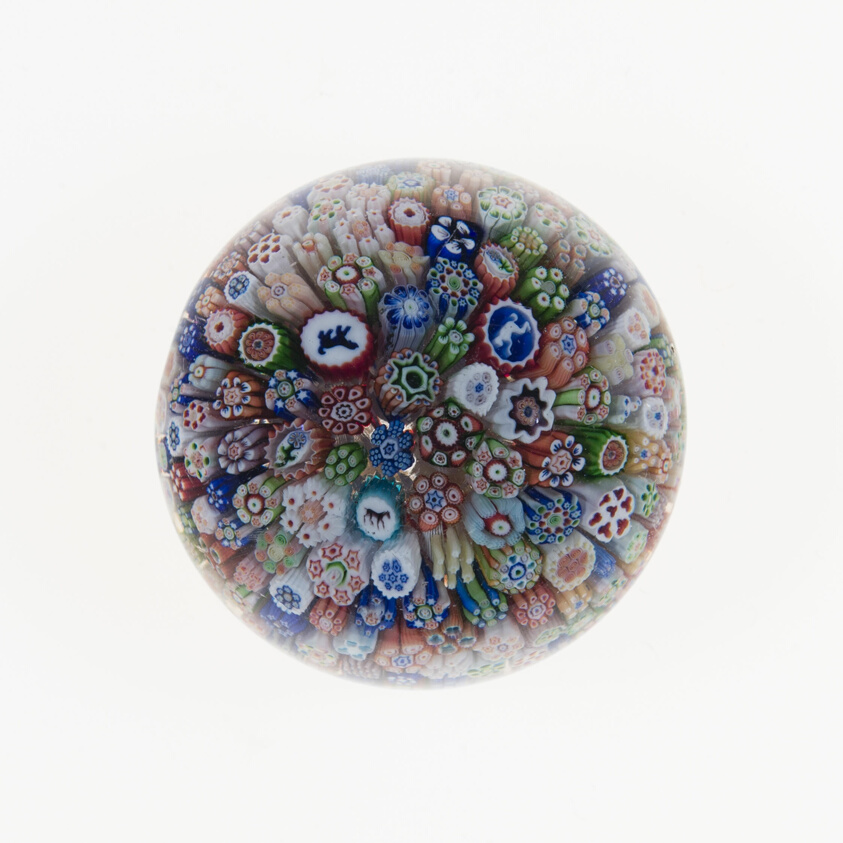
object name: Glass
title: Paperweight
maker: Baccarat Glassworks (Cristalleries de Baccarat); Lorraine, France, founded 1764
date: c. 1845/60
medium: Glass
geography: France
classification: paperweight; glass